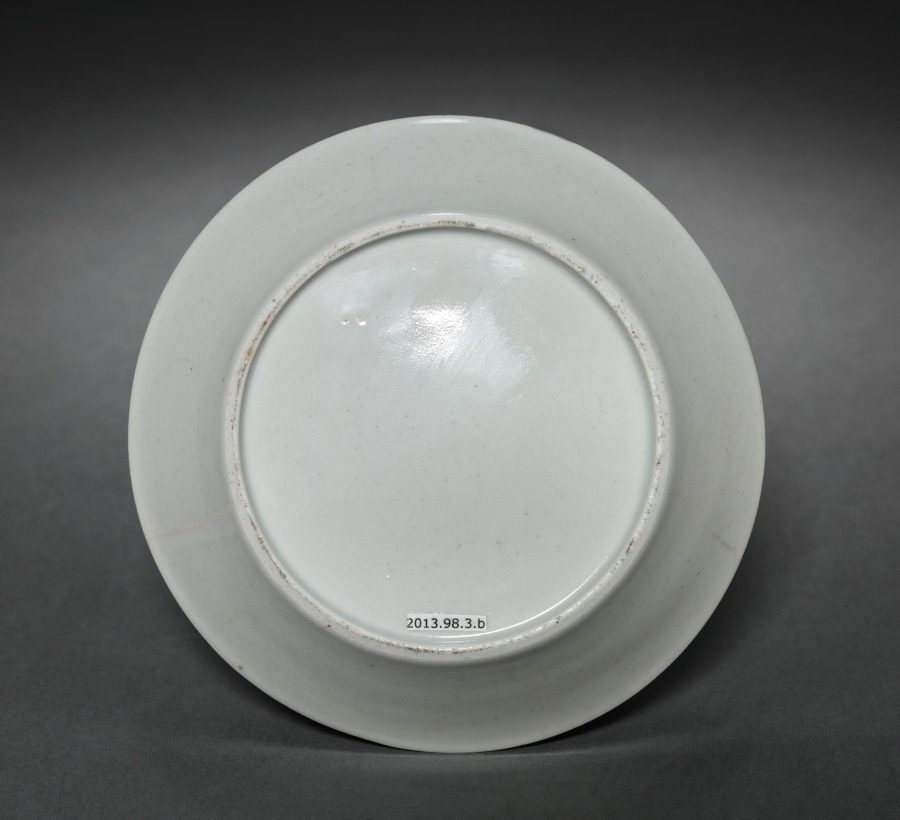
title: Saucer from Oliver Wolcott, Jr. Tea Service (3 of 6)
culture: Chinese Export porcelain, late 18th-early 19th century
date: 1785–1805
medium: porcelain, sepia enamel, gold leaf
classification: Ceramic